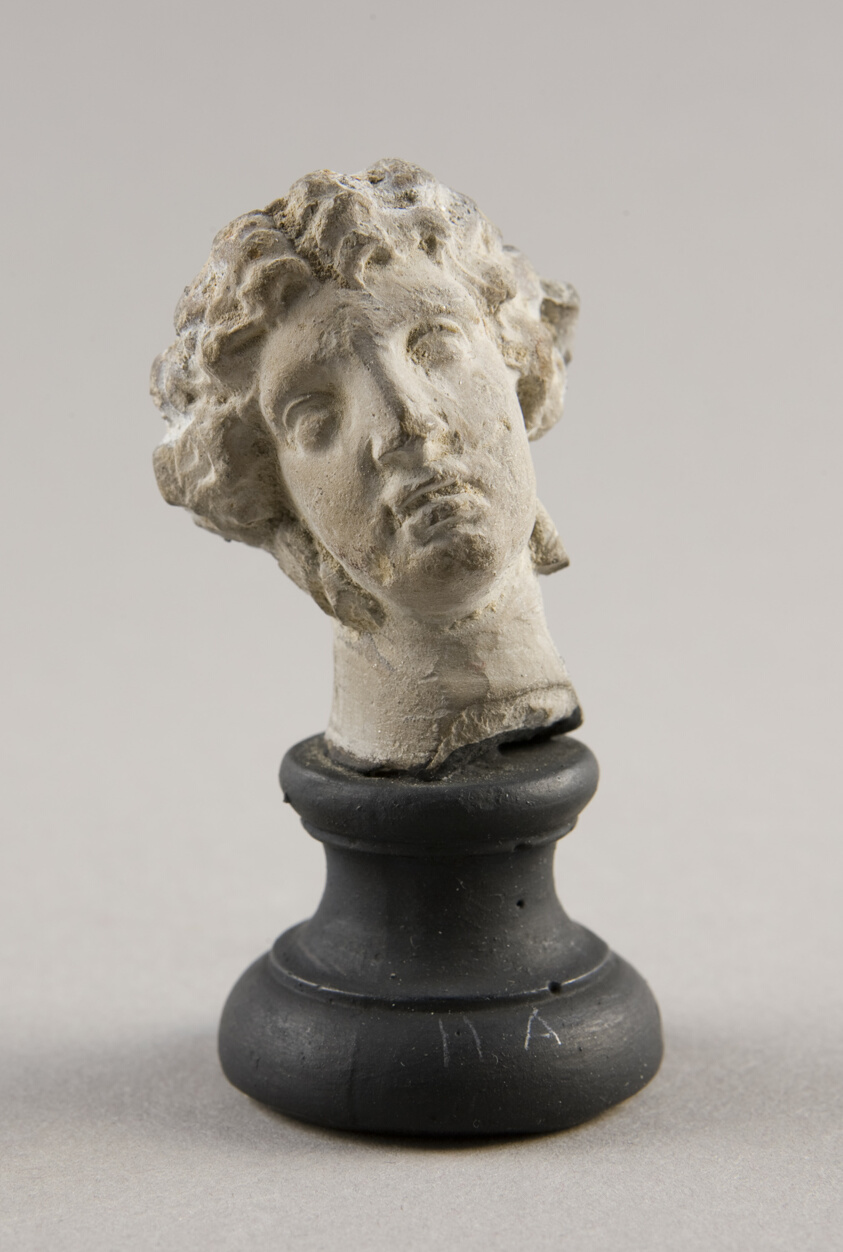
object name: Sculpture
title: Head of a Man or Woman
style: greek, ancient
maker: Greek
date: 3rd-2nd century BCE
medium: terracotta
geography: Greece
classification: earthenware; ceramics; sculpture; ancient art